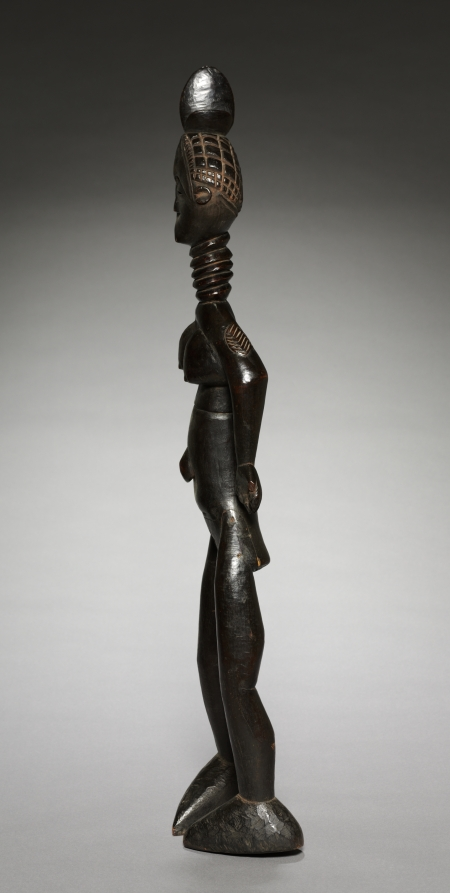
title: Female Figure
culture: Africa, West Africa, Sierra Leone, Mende or Bullom style, unknown maker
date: early 1900s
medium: wood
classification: Sculpture